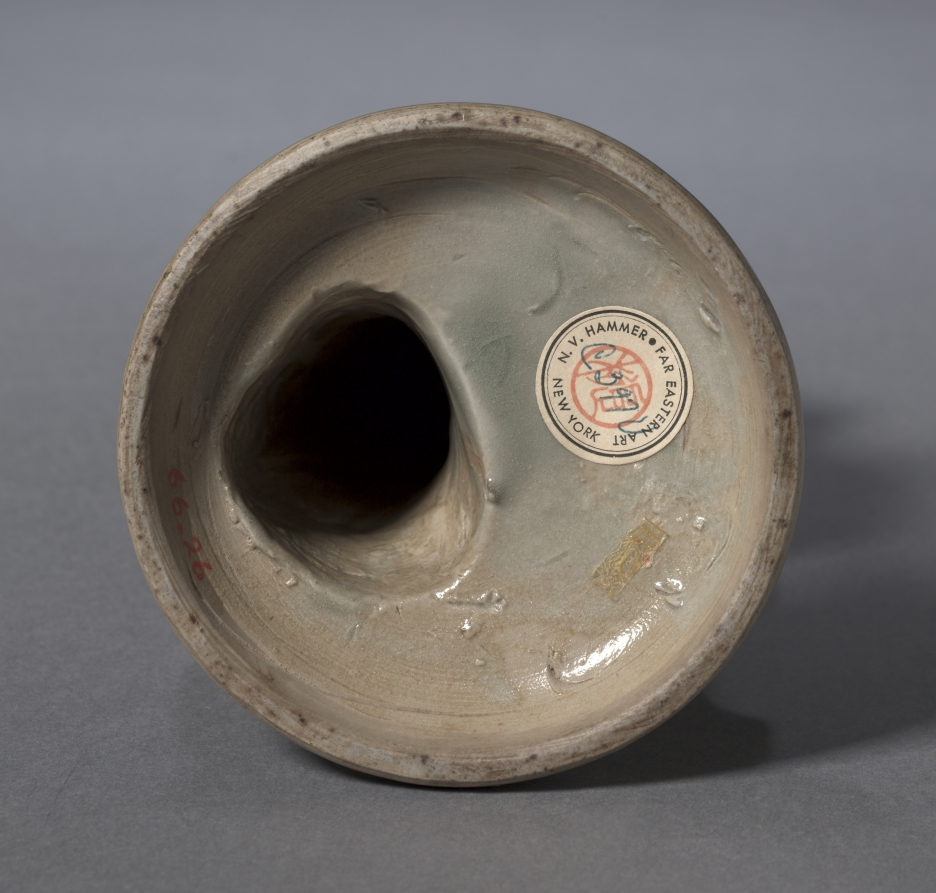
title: Incense Burner Top in the Shape of a Lion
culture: China, Shaanxi province, Northern Song dynasty (960-1127)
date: 1100s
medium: green-glazed porcelaneous stoneware, Yaozhou ware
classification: Ceramic